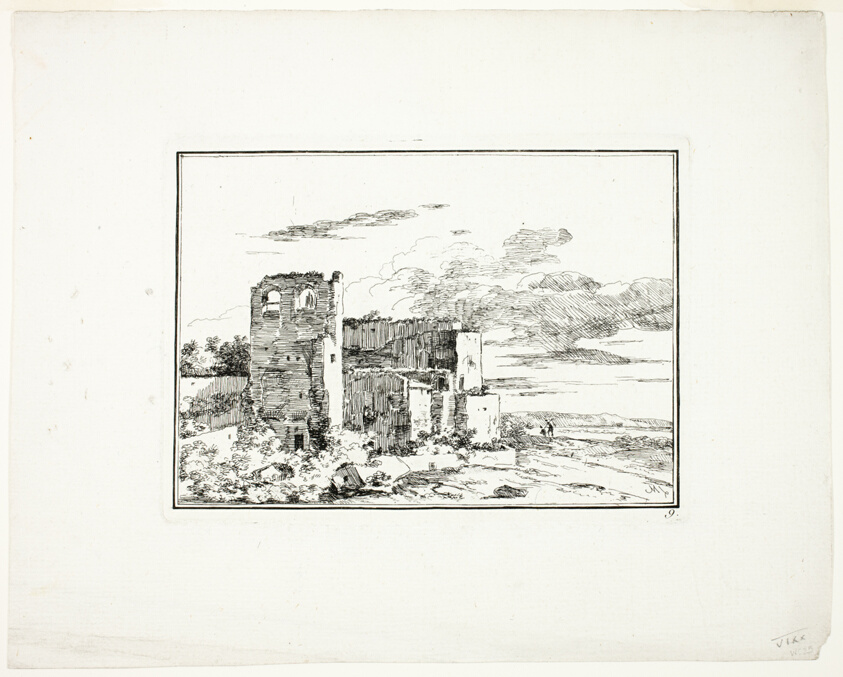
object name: Print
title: Ruined Buildings near a River Bank, plate 9 from Quatrieme suite de paysages dessinés et grave a l’eau-forte par Moreau (Fourth Series of Landscapes Drawn and Etched by Moreau)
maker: Louis Gabriel Moreau (French, 1740-1806)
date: c. 1779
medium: Etching in black on ivory wove paper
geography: France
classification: etching; print; prints and drawing